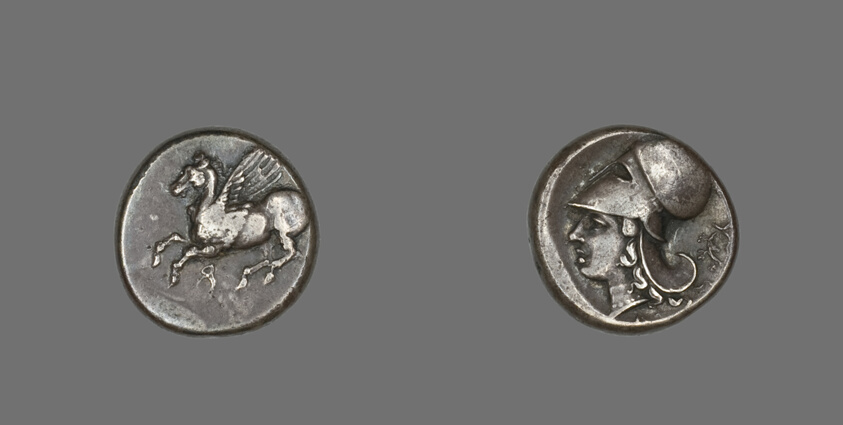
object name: Coin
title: Stater (Coin) Depicting Pegasus Flying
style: greek, ancient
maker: Greek, minted in Corinth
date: 4th-3rd century BCE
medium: Silver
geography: Corinth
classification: coin; ancient art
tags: mythological figures, bird, deities, pegasus